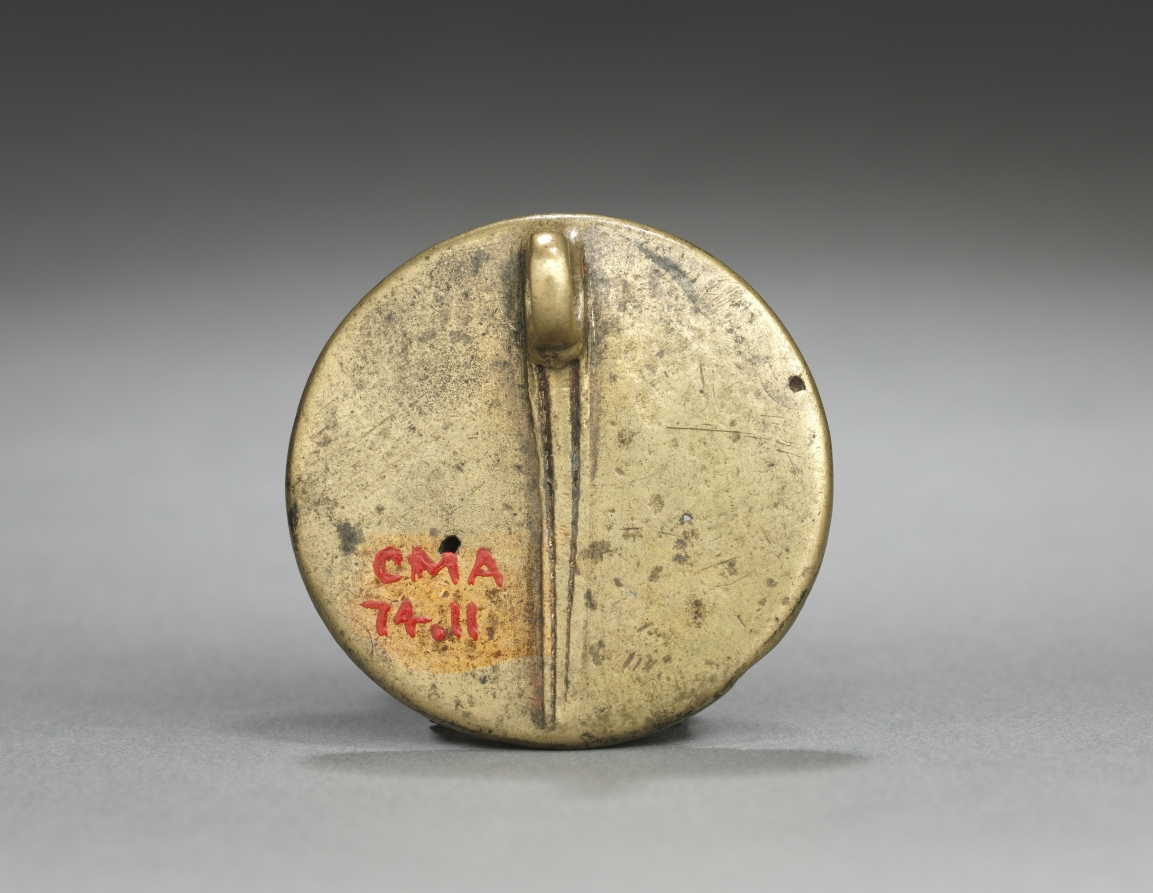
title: Almond-Shaped Seal: Coronation of the Virgin with a Kneeling Monk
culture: England or Germany, Gothic period, 14th century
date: 1300–1400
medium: gilded bronze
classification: Glyptic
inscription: Latin inscription from Proverbs 1:8: AUDI, FILI MI, DISCIPLINAM PATRIS TUI. ET NE DIMITTAS LEGE MATRIS TUI.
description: These seals were once used in monasteries as molds for making wax impressions that were routinely pressed onto letters, charters, and other documents as proof of authenticity.